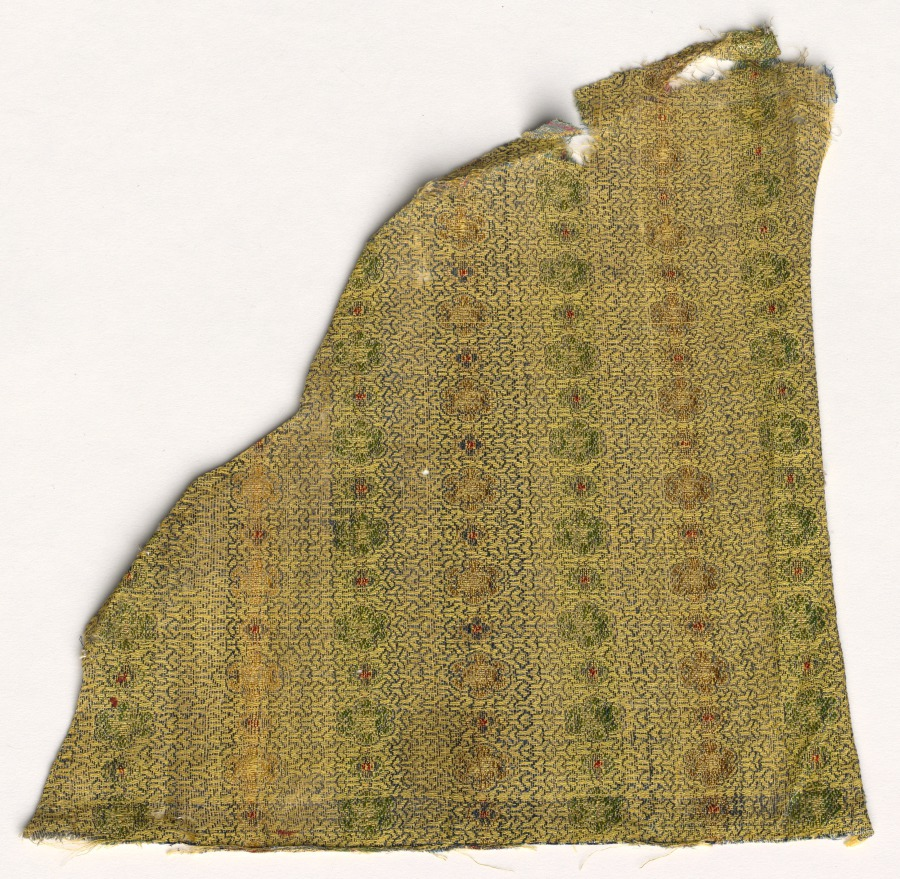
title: Fragment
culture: China, 19th century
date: 1800s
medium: silk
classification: Textile